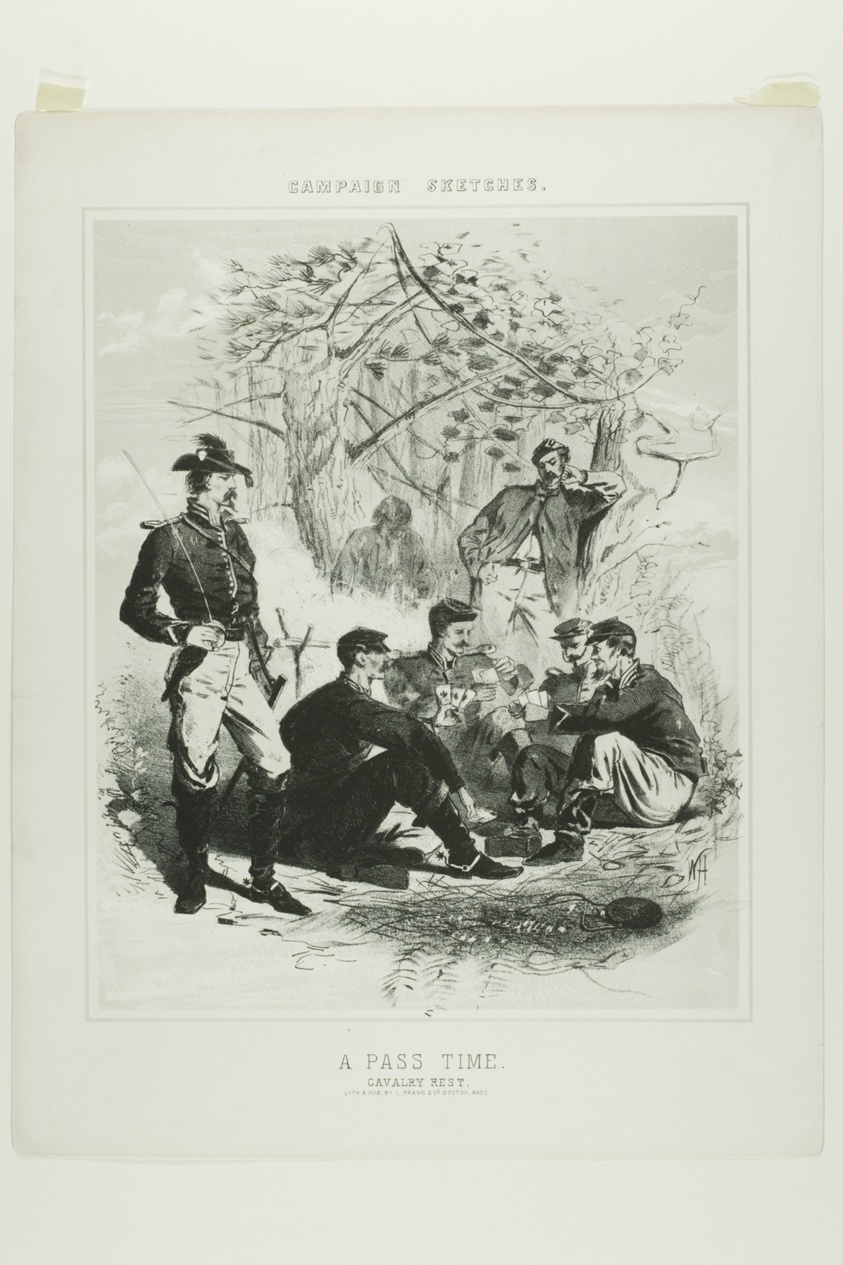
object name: Print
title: Campaign Sketches: A Pass Time - Cavalry Rest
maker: Winslow Homer (American, 1836–1910)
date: 1863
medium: Tint lithograph on heavy ivory wove paper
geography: United States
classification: lithograph; print; prints and drawing